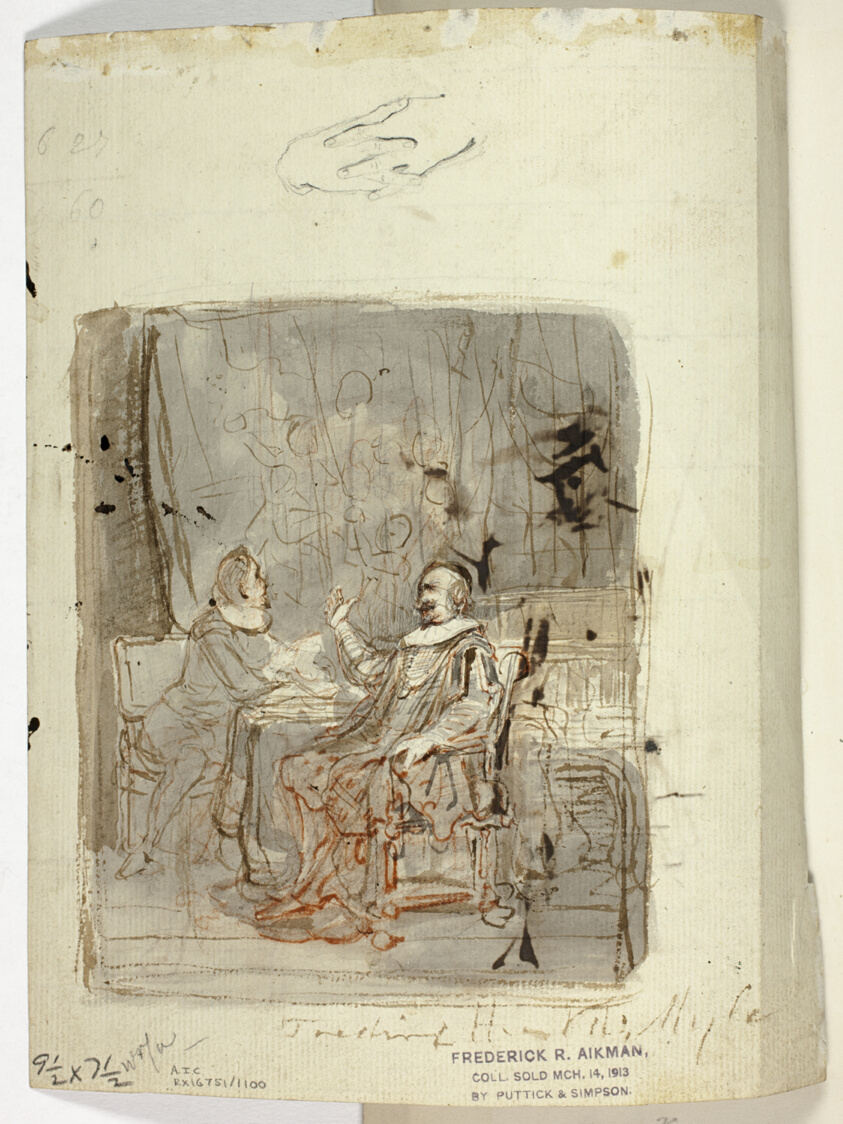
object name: Drawing and Watercolor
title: Dr. Nicholas Tulp in Rembrandt's Studio (recto); Scene from Rembrandt's Life (?) (verso)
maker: Jacob Ludovicus Cornet (Dutch, 1815-1882); after Rembrandt van Rijn (Dutch, 1606-1669)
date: 1846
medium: Pen and brown ink with brush and gray and brown wash and white gouache, over graphite, with scraping (recto), and pen and brown ink with brush and brown and gray wash, over red chalk and graphite (verso), on ivory laid paper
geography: Holland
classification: watercolor; drawings (visual works); prints and drawing